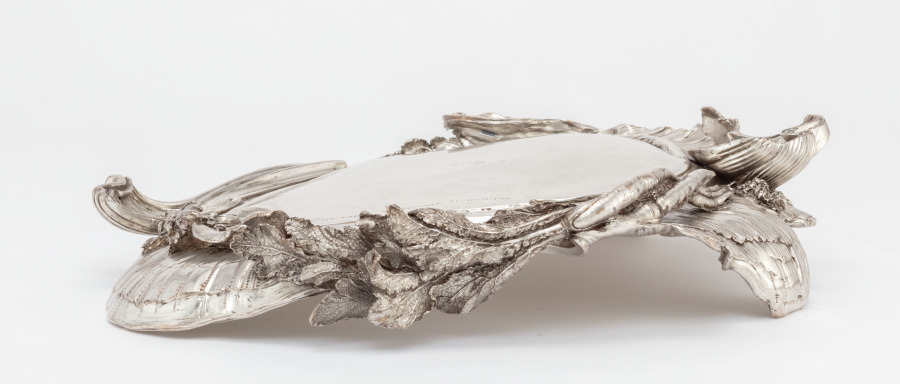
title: Stand for a Covered Tureen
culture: France, Paris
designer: Juste-Aurèle Meissonnier (French, 1695–1750)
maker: Pierre-François Bonnestrenne (French)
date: 1735–38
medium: silver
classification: Silver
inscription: engraved Meissonnier signature.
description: See entry for cover record 1977.182.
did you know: The langoustine, pigeon, and vegetables were cast using real examples giving the silver copies lifelike detail and appearance.